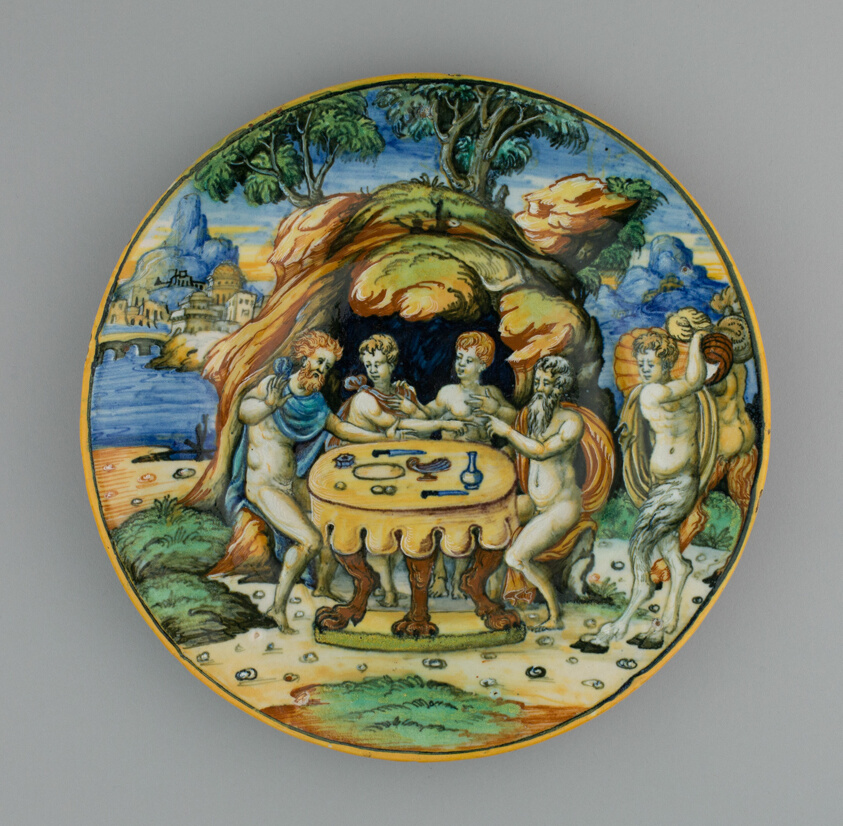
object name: Ceramics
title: Plate with Theseus in the House of Achelous, from the Lancierini Service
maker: Italian; Urbino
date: 1540/50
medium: Tin-glazed earthenware (maiolica)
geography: Italy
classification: ceramics; european decorative arts; decorative arts